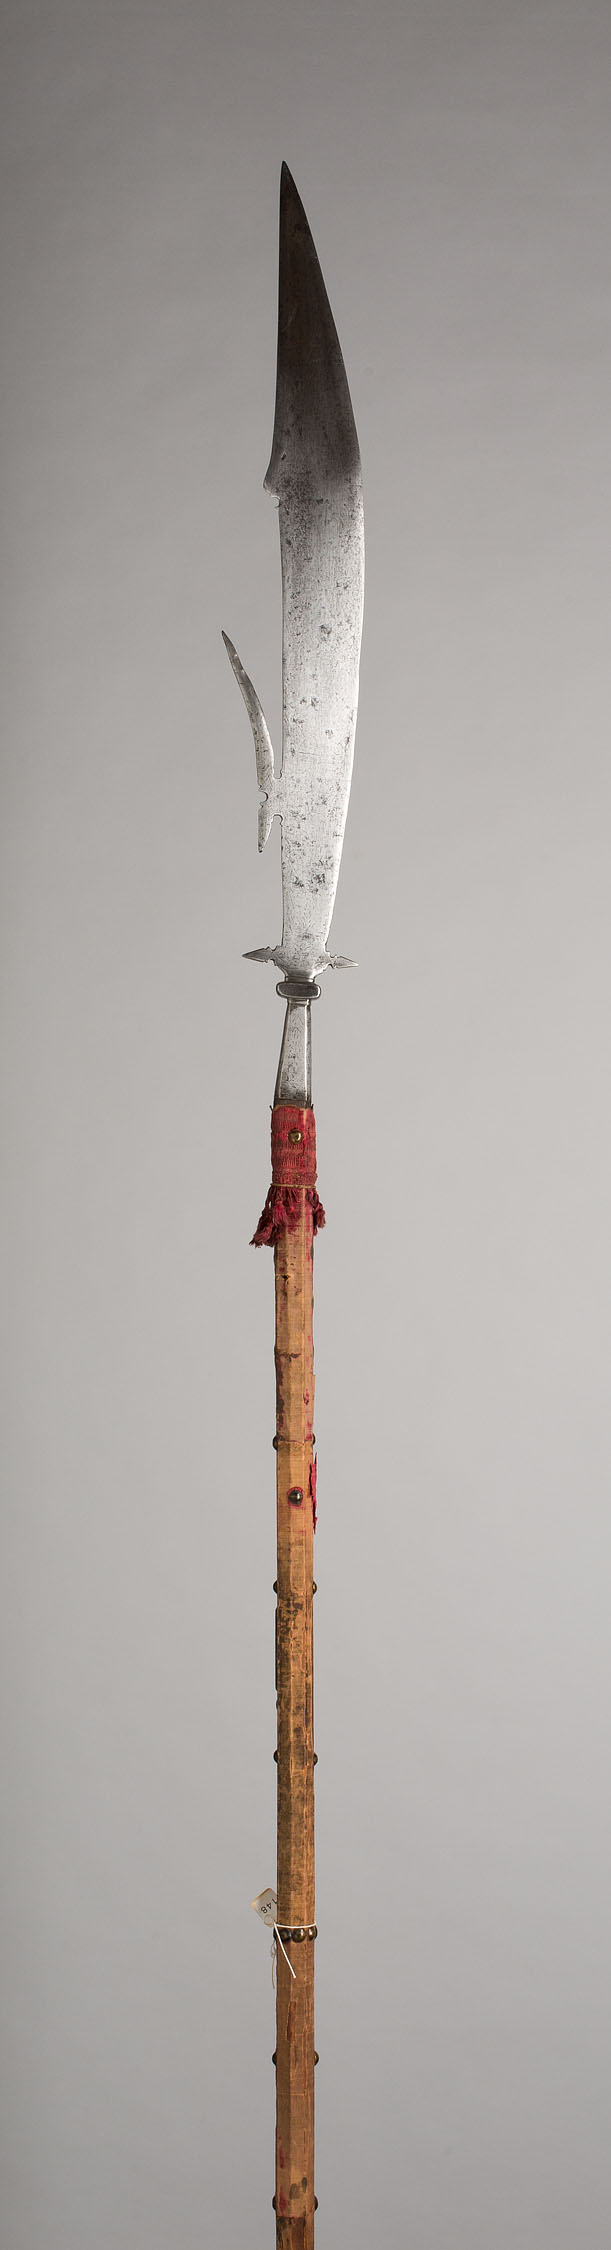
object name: Arms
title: Ceremonial Glaive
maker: Italian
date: 1575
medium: Steel, wood, velvet, cotton, brass, and iron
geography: Italy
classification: edged weapon-staff; arms; arms and armor